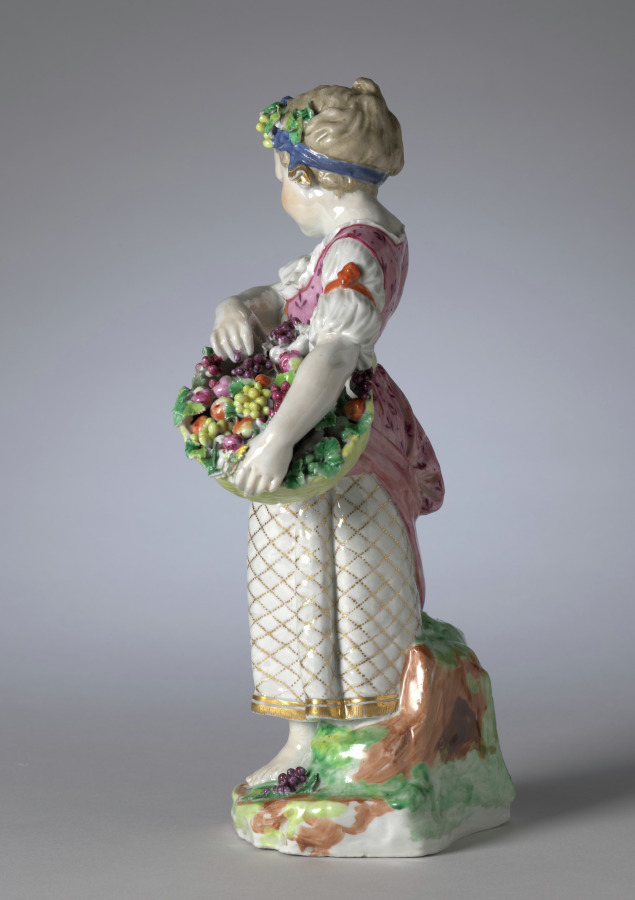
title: Figure of Autumn from the Four Seasons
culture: England, Bristol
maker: Bristol Porcelain Factory (British, 1770–81)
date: c. 1775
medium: hard-paste porcelain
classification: Ceramic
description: The modern notion of childhood as a time of innocence and simplicity emerged during the second half of the eighteenth century. This understanding of adolescence led to numerous depictions of children as personifications of the four seasons. Here autumn is portrayed as a young girl playfully jostling her overskirt as she balances a basket of fruit against her hip. The grapes, plums, and apples filling her basket allude to a plentiful fall harvest.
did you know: Allegorical figures most often decorated a table during the dessert course, providing amusing subjects for conversation.